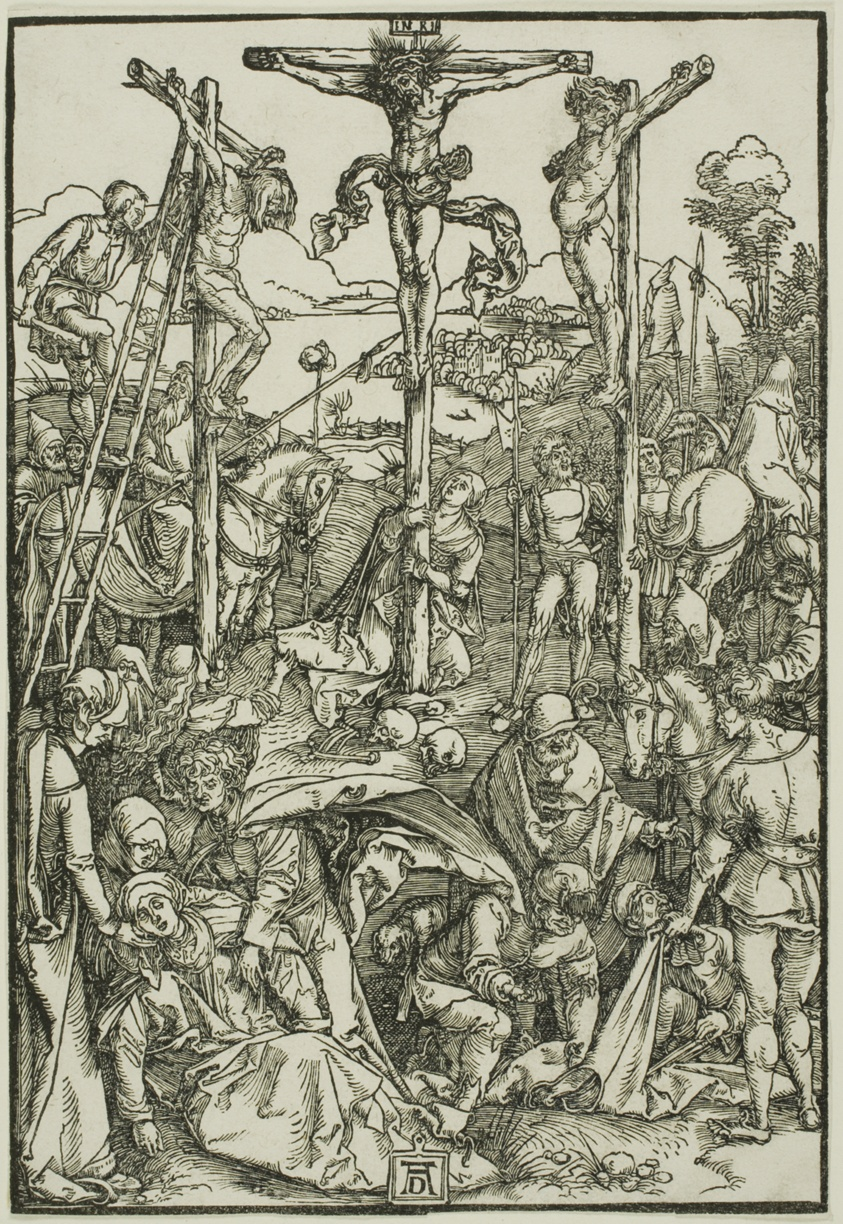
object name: Print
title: Calvary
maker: Albrecht Dürer (German, 1471-1528)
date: c. 1503–04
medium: Woodcut in black on ivory laid paper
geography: Germany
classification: woodcut; print; prints and drawing; paper